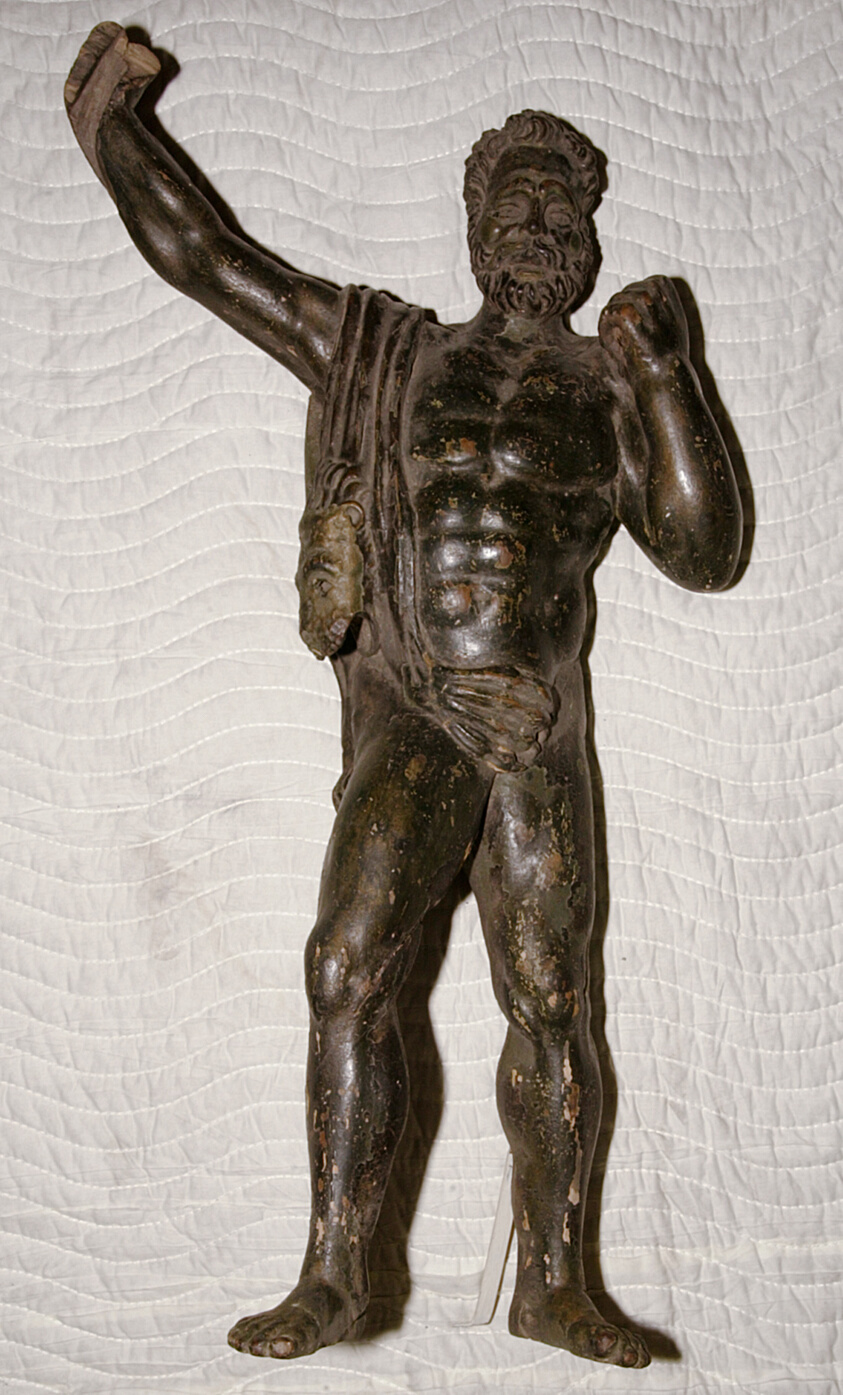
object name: Sculpture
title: Standing Figure of Hercules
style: 18th Century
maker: School of Andrea Brustolon (Italian, 1662–1732)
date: 1700/25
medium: Wood with traces of gilding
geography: Italy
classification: statuette; Italian; sculpture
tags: Greek mythology, nudes, mythology, mythological figures, mythical, man, lions, animals